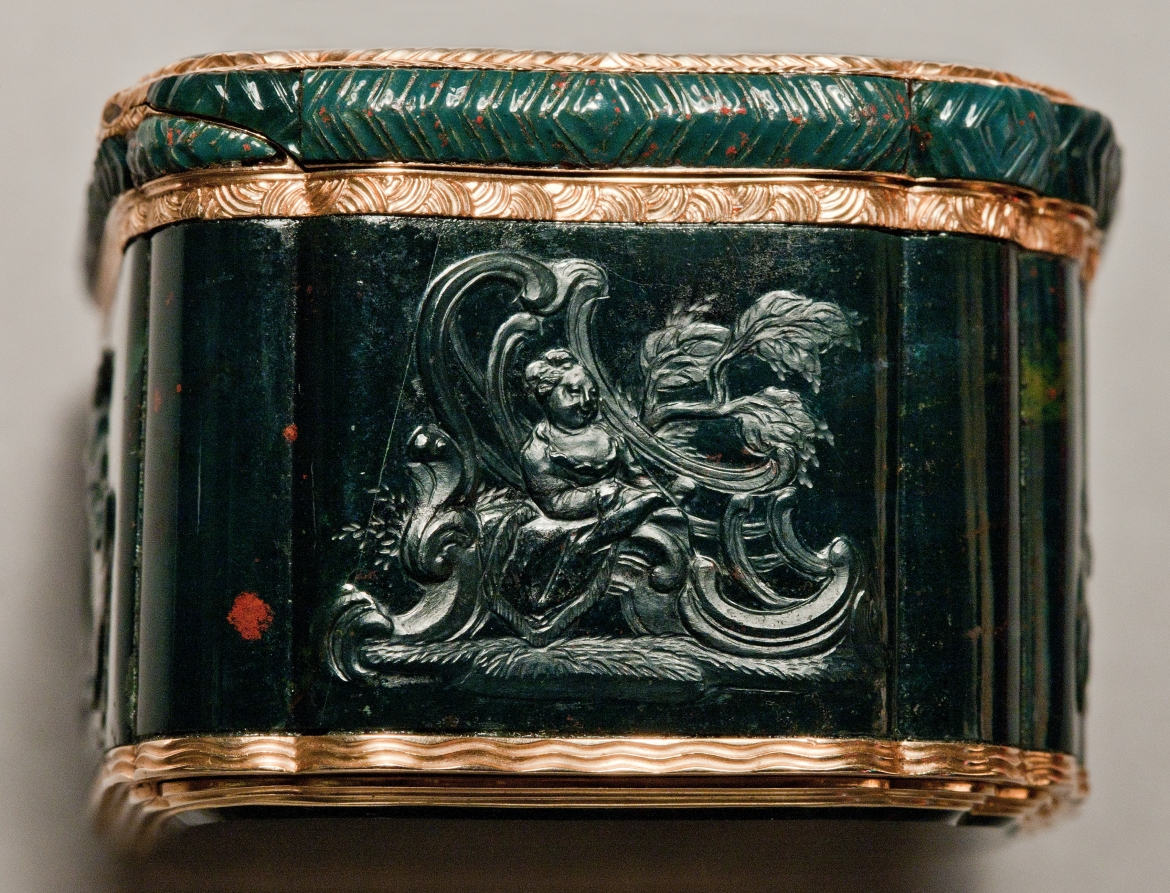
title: Snuff Box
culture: Germany, Berlin, mid-18th century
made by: attributed to Johannes George Klette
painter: Carl Gustav Klingstedt (Swedish, 1657–1734)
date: c. 1750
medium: gold-mounted carved bloodstone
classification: Miscellaneous